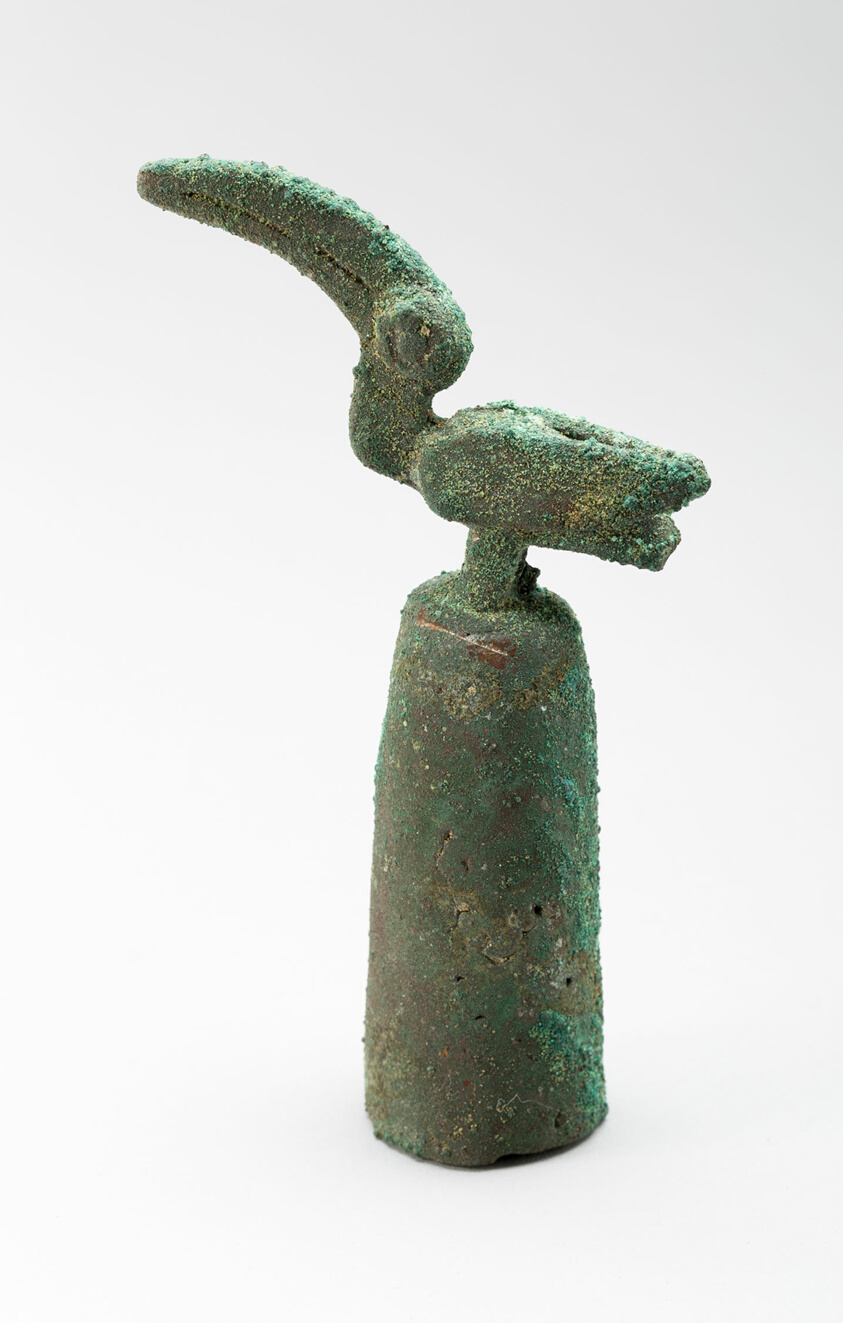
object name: Architectural fragment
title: Finial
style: chimú, late intermediate period, Pre-Columbian, americas, Arts of the Americas, andean, andes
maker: Chimú (North coast, Peru)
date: 1100–1470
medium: Bronze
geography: Peruvian North Coast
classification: metal; decorative object/ornament; art of the americas; architectural fragment